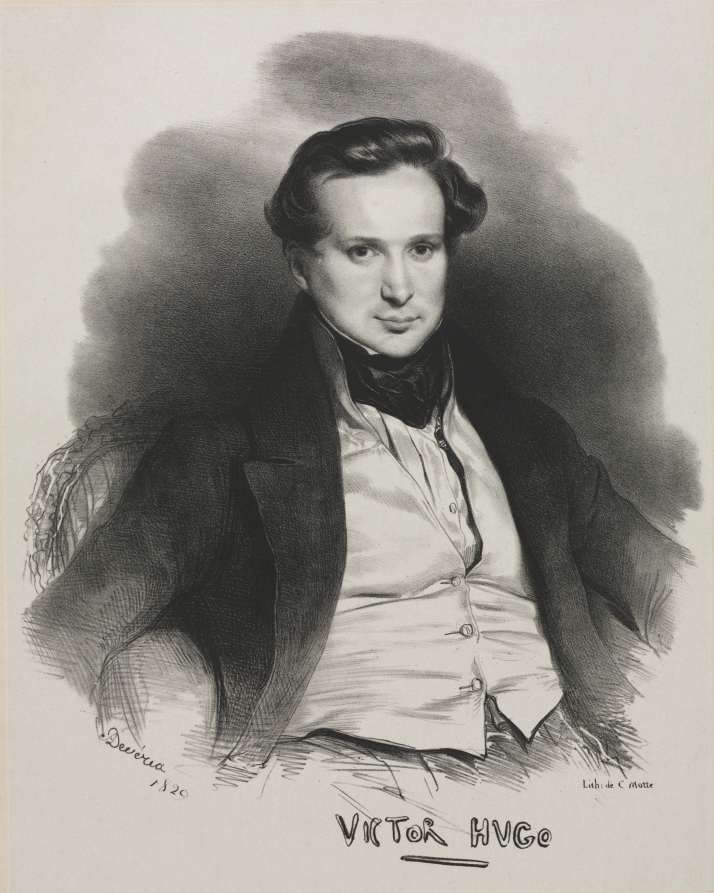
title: Victor Hugo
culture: France, 19th century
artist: Achille Devéria (French, 1800–1857)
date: 1829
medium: lithograph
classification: Print